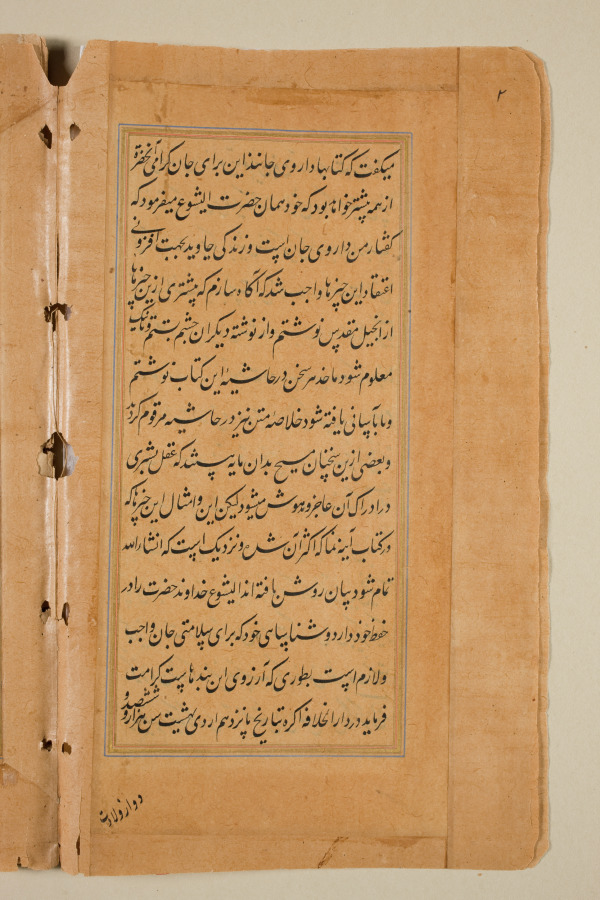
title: Text, Folio 5 (verso), from a Mirror of Holiness (Mir’at al-quds) of Father Jerome Xavier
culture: Mughal India, Allahabad, made for Prince Salim (1569–1627)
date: 1602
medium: Ink and gold on paper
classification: Manuscript